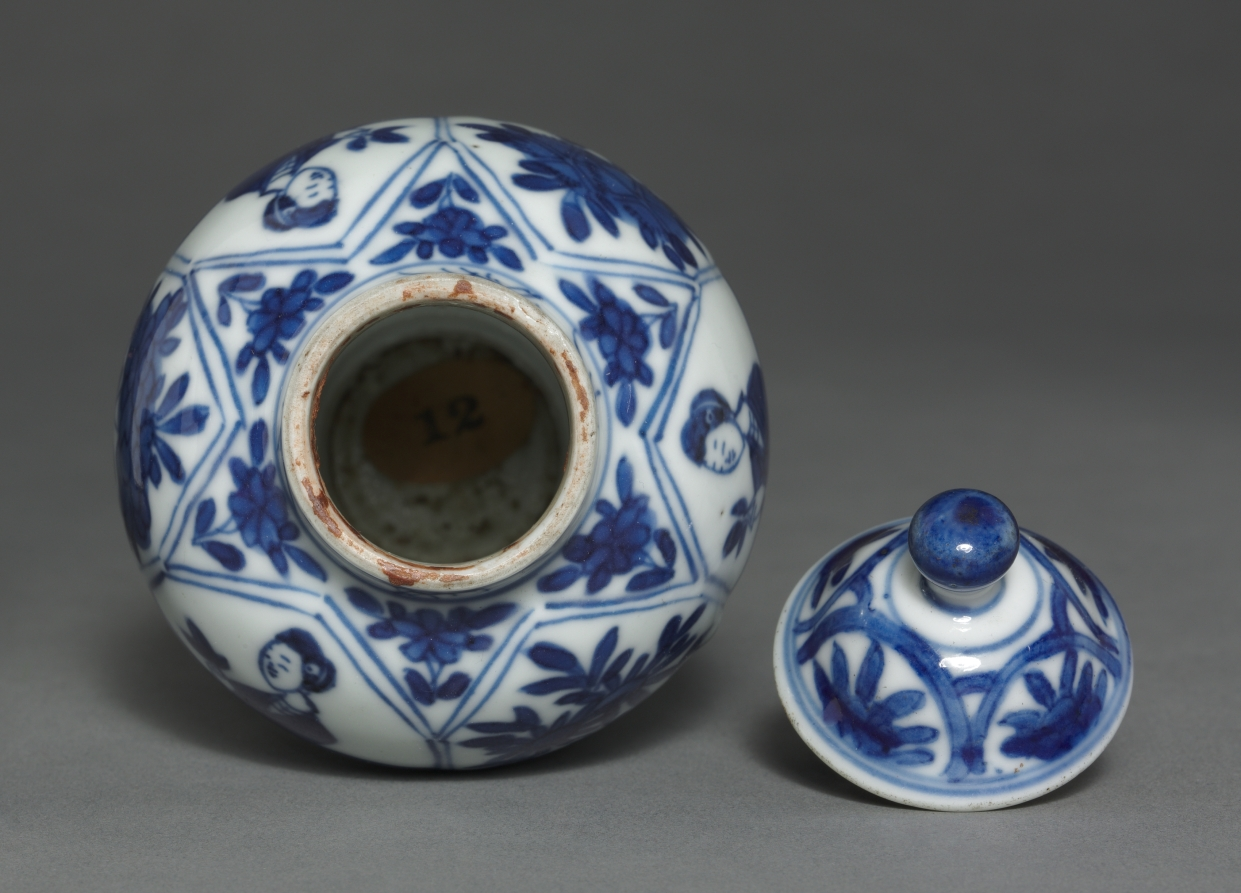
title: Jar with Cover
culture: China, Qing dynasty (1644-1911)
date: 19th Century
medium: porcelain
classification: Ceramic